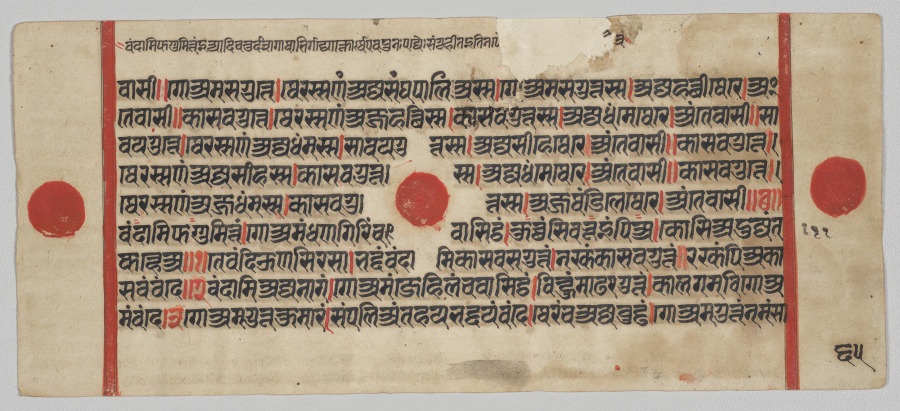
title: Text, Folio 65 (verso), from a Kalpa-sutra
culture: Western India, Gujarat, last quarter of the 15th century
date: c. 1475–1500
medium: Gum tempera, ink, and gold on paper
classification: Painting